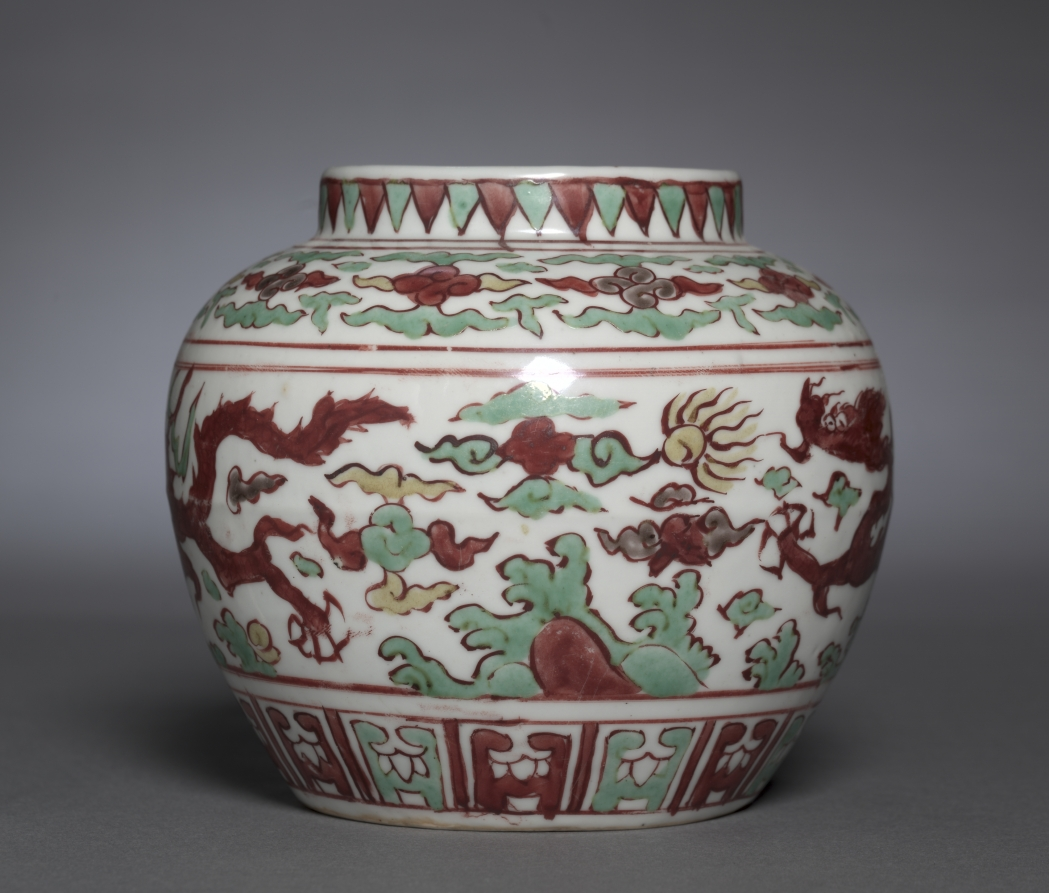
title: Jar with Dragons Pursuing Flaming Jewels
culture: China, Jiangxi province, Jingdezhen kilns, Ming dynasty (1368-1644), Jiajing mark and reign (1522-66)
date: 1522–66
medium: procelain with wucai (five color) overglaze enamel decoration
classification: Ceramic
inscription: 大明嘉靖年製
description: The exterior of this jar is ornamented with two rampant five-clawed dragons boldly drawn in rouge de fer. The dragons are in pursuit of the sacred jewel amid cloud scrolls in green and yellow, flanked at the top and bottom with broad registers of cloud scrolls and gadroons. The underfoot is glazed and bears a six-character nianhao in the form of a vertical mark reading "Daming Jiajing nianzhi," enclosed in double rings in underglaze cobalt blue.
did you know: The interior is glazed white porcelain.